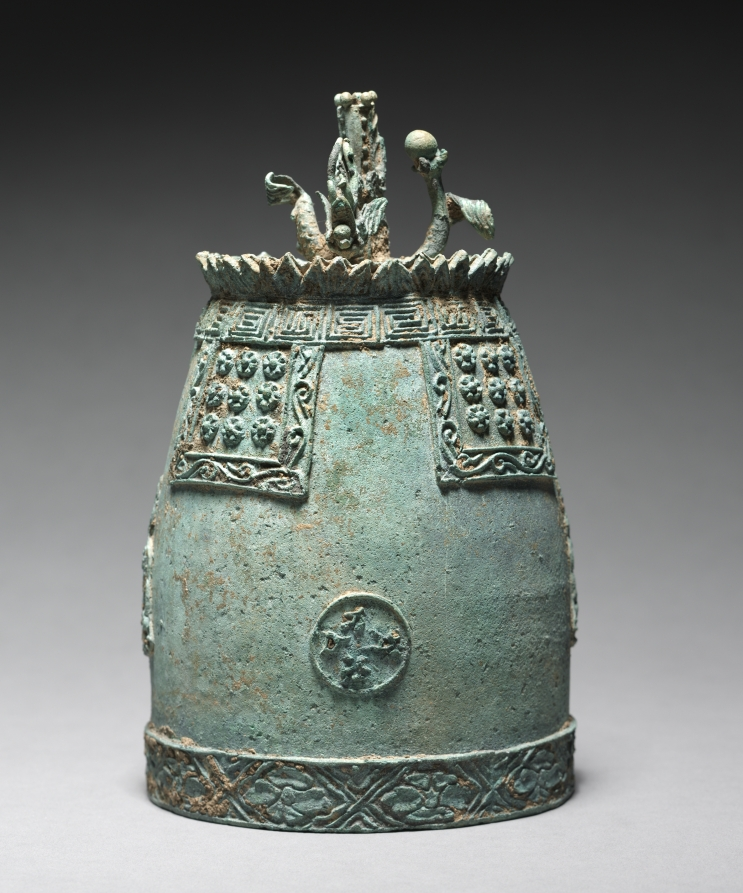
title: Bronze Ritual Bell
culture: Korea, Goryeo dynasty (918–1392)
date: 1226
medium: cast bronze with incised inscription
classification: Metalwork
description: This miniature bell was once used as part of Buddhist indoor rituals. Likely suspended in a Buddhist temple, it features a cast dragon and a vertical tube to amplify the sound on top, and is decorated with Buddhist figures seated on lotuses. The echoing sound of the bell was thought to help Buddhist believers understand the significance of transience and impermanence; the sound instantly fades away as soon as one hears it. This sensory experience creates a striking conceptual parallel with Buddhist teachings, including the idea that all things and beings exist merely in our perception or imagination. An inscription indicates it was cast in the year of the dragon and took three years to make.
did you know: The inscription informs us that this miniature indoor bell was produced in 1226.